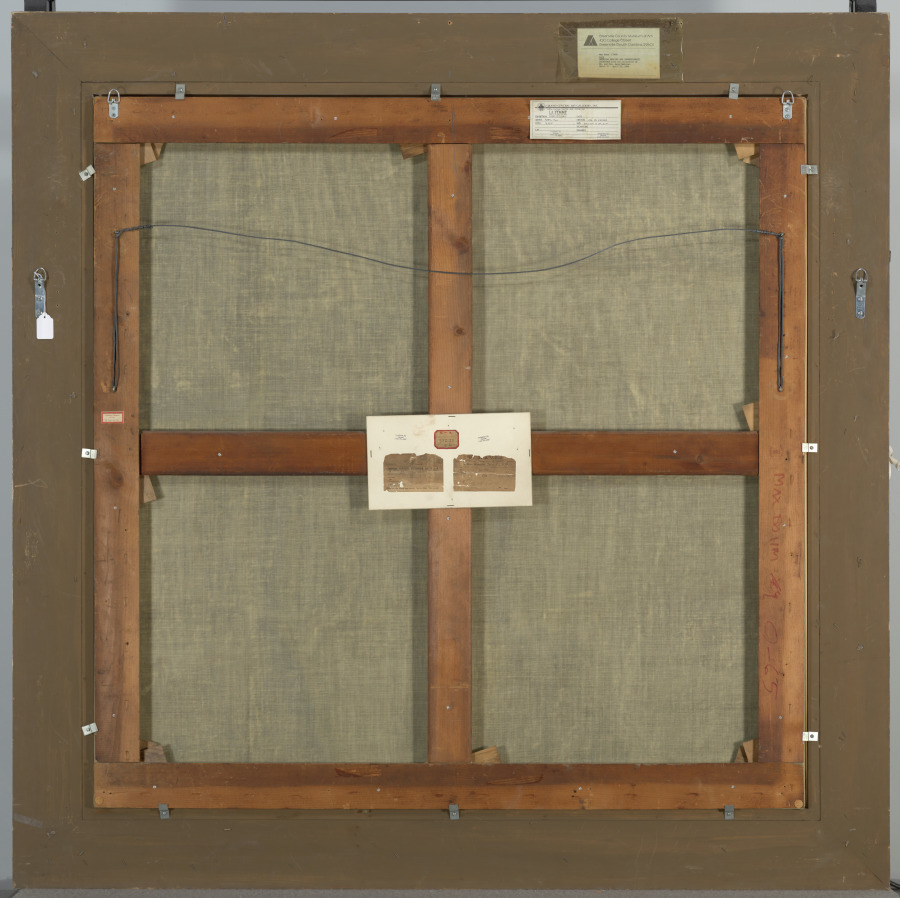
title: Lucy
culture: America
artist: Max Bohm (American, 1868–1923)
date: 1909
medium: oil on canvas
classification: Painting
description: Painted during expatriate Max Bohm’s visit to his hometown in Cleveland, Lucy depicts a former love interest, who years earlier turned down the artist’s marriage proposal because she doubted his ability to earn a steady income. During the intervening time, Bohm had wed someone else and established himself as a noted painter, earning success particularly in France and England.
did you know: Bohm created this painting while working on a commissioned mural for the Cuyahoga County Courthouse.